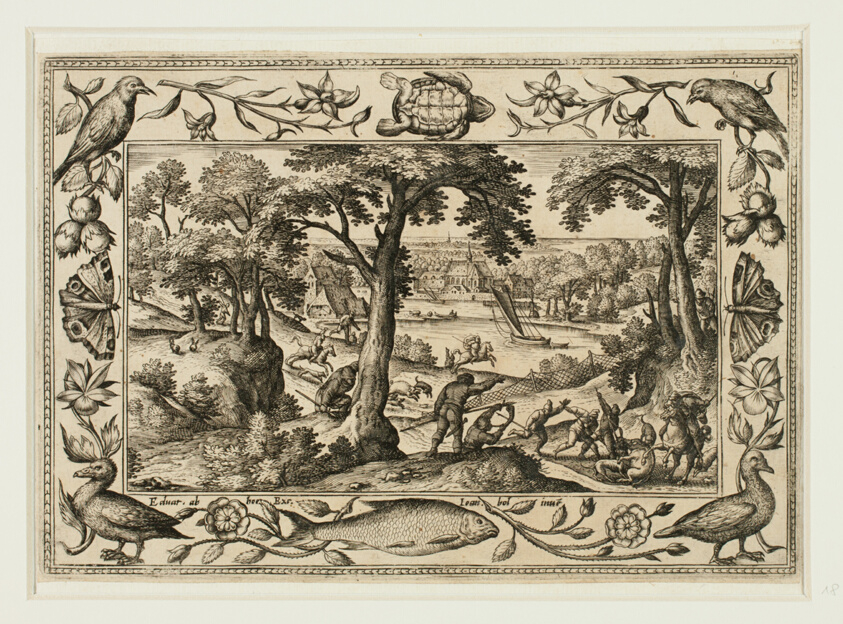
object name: Print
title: Boar Hunt, from Landscapes with Old and New Testament Scenes and Hunting Scenes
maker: Adriaen Collaert (Flemish, c. 1560–1618); after Hans Bol (Flemish, 1535–1593); published by Anna van Hoeswinckel (Flemish)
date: 1584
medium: Engraving in black on cream laid paper, laid down on cream laid paper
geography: Flanders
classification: engraving; paper; print; prints and drawing